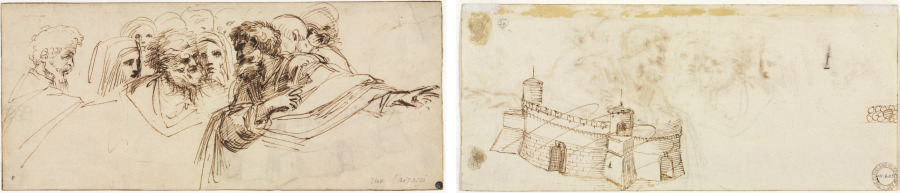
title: Study of Heads (recto); Crenelated Fortress (verso)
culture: Italy, second half 16th century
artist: Agostino Carracci (Italian, 1557–1602)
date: 2nd half 1500s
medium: pen and brown ink; framing lines in brown ink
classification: Drawing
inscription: lower right, in black chalk: Ann . Carracci